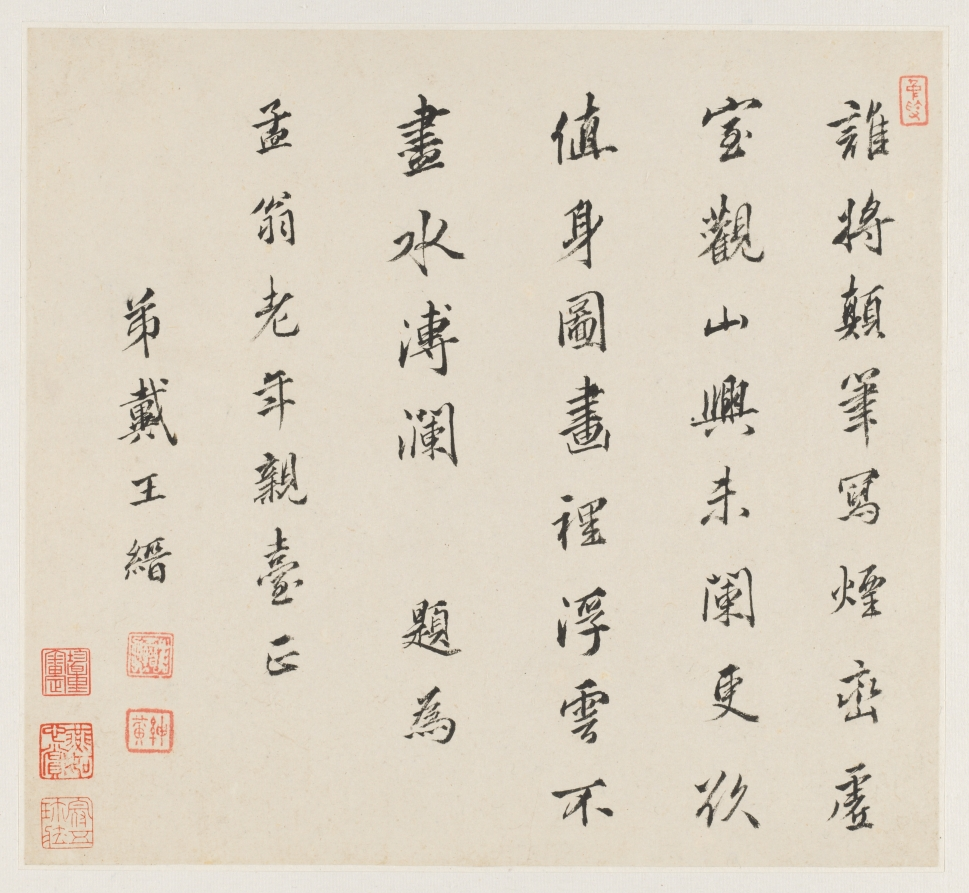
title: Album of Landscapes: Leaf 5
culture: China, Qing dynasty (1644-1911)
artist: Wang Gai (Chinese, active c. 1677–1705)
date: 1677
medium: album leaf, ink and light color on paper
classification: Painting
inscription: Artist's inscription, signature, and seal on leaf 5: In imitation of (T'ang) Wang Hsia's use of ink. Wang Gai of Hsiu-shui (seal) Gai Poem by Tai Wang-chin